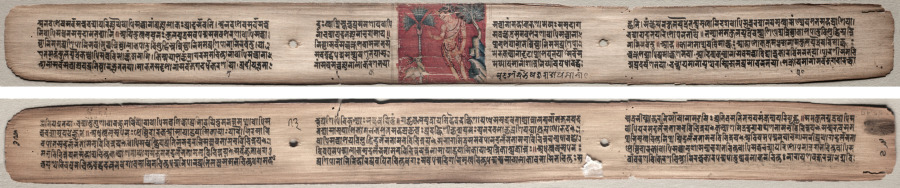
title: Folio 73 from a Gandavyuha-sutra (Scripture of the Supreme Array): Sudhana and an antelope (recto); text (verso)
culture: Nepal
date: 1000–1100s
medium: gum tempera and ink on palm leaf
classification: Painting